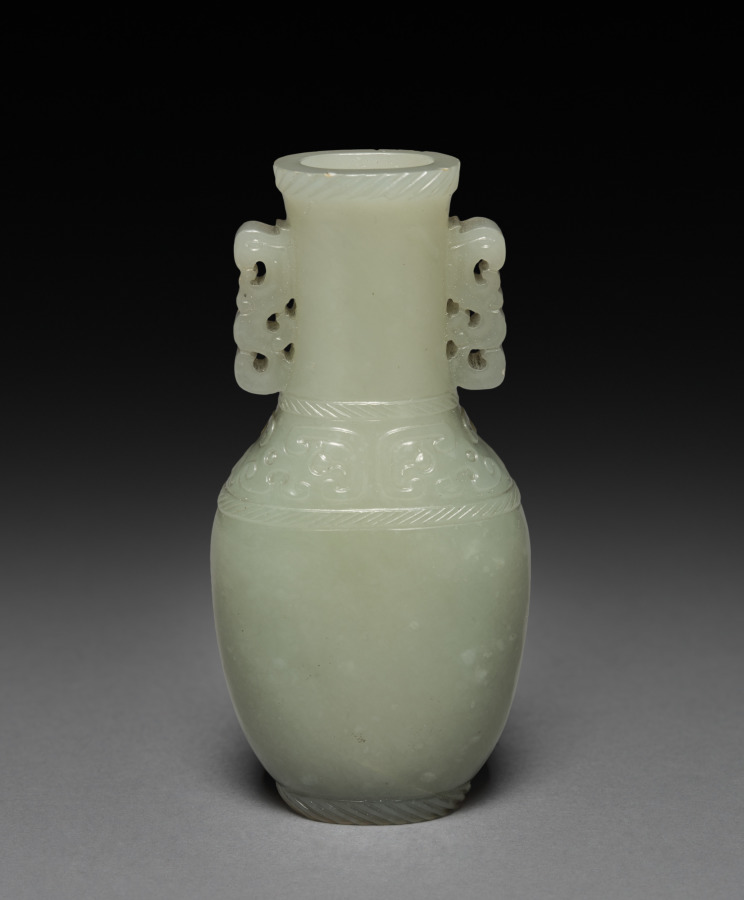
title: Bottle with Stopper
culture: China, Qing dynasty (1644–1911), Qianlong reign (1736–95)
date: 1736–95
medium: jade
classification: Jade